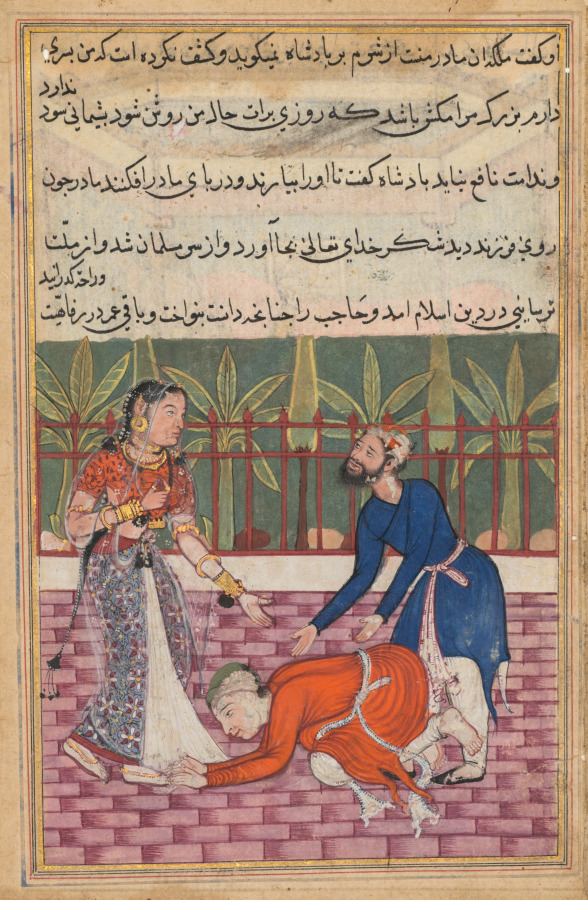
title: The guard restores the son who falls at his mother’s feet, from a Tuti-nama (Tales of a Parrot): Fiftieth Night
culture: Mughal India, court of Akbar (reigned 1556–1605)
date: c. 1560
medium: gum tempera, ink, and gold on paper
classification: Painting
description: The princess of Rum is overjoyed to discover that her son is alive. The king had ordered the young man’s execution after wrongly believing him to be his wife’s lover. The guard, who spared the young man’s life, is generously rewarded for his kindness.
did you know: The garden is decorated with a row of alternating banana and cypress trees.